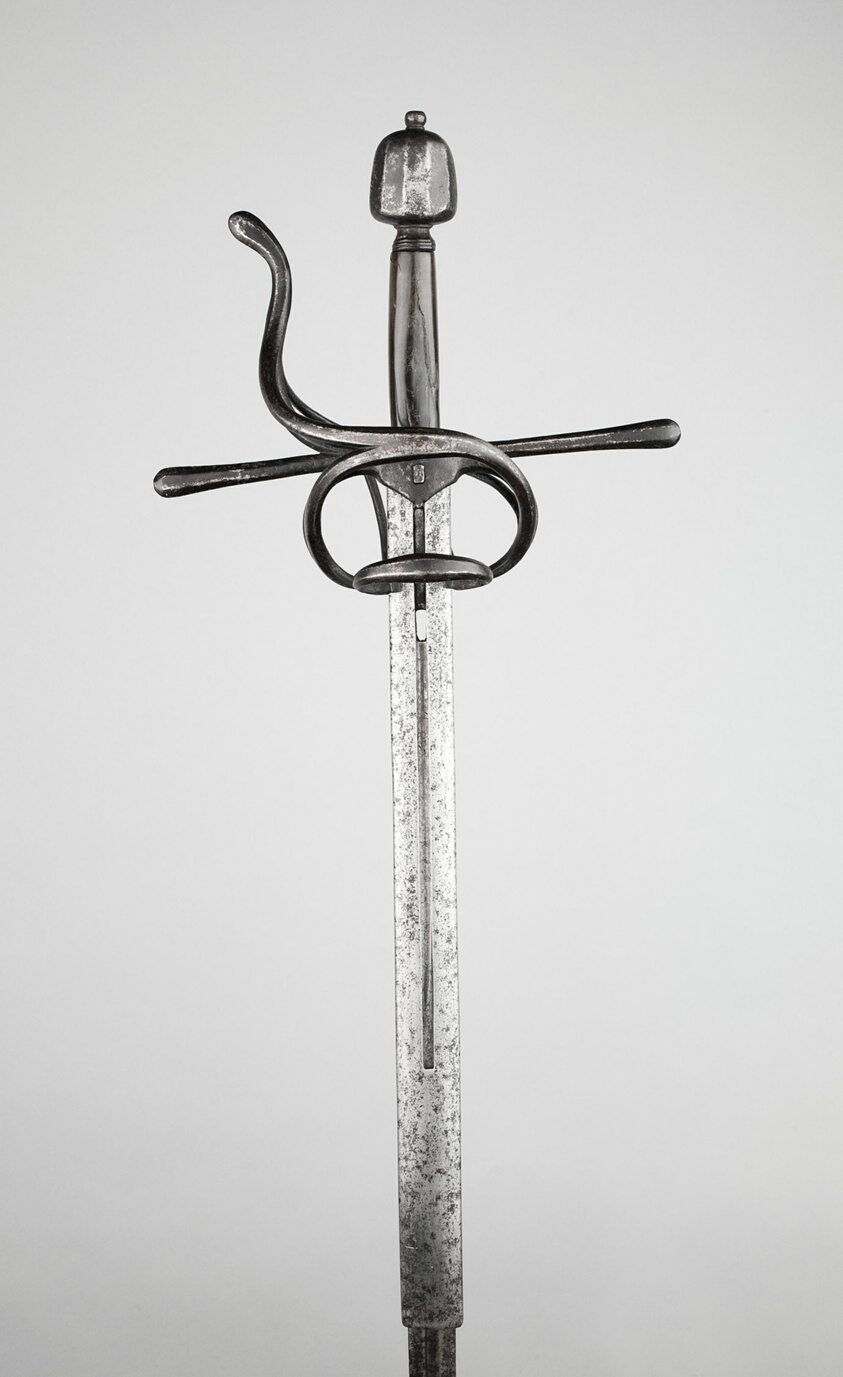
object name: Arms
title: Rapier with Extendable Handle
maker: German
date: c. 1590/1600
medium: Steel and wood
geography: Germany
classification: edged weapon-sword; arms; arms and armor